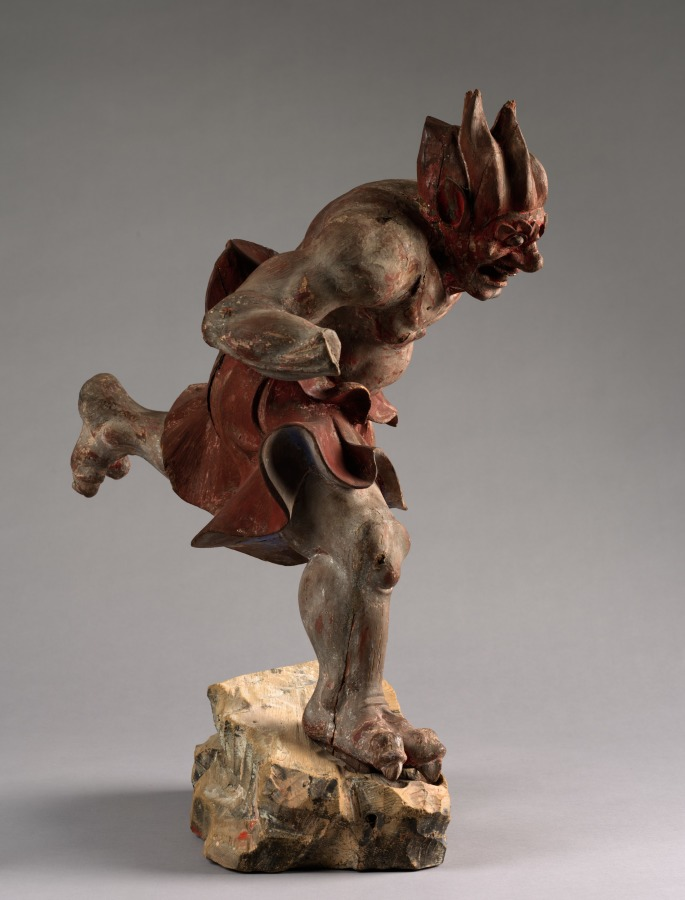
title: Thunder God (Raijin)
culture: Japan, Kamakura period (1185–1333)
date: 1300s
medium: wood with traces of gesso and red and black pigment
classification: Sculpture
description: The Thunder (Raijin) and Wind (Fujin) gods first appeared in early Buddhist art in China and Japan and were based on the popular imagery in India that was derived from the life of the historical Buddha, Shakyamuni. They were shown among a group of demon-monsters flying through the sky above the meditating Shakyamuni in an attempt to frighten away his concentration. Raijin is surrounded by a ring of small drums struck by a stick held in his hand so that he is always accompanied by a thunderous noise. A metal clasp protruding from this sculptures' back indicates that a ring of drums was once attached to the Cleveland Raijin. The matching sculpture, Fujin, is in the Fukuoka Art Museum in Japan.